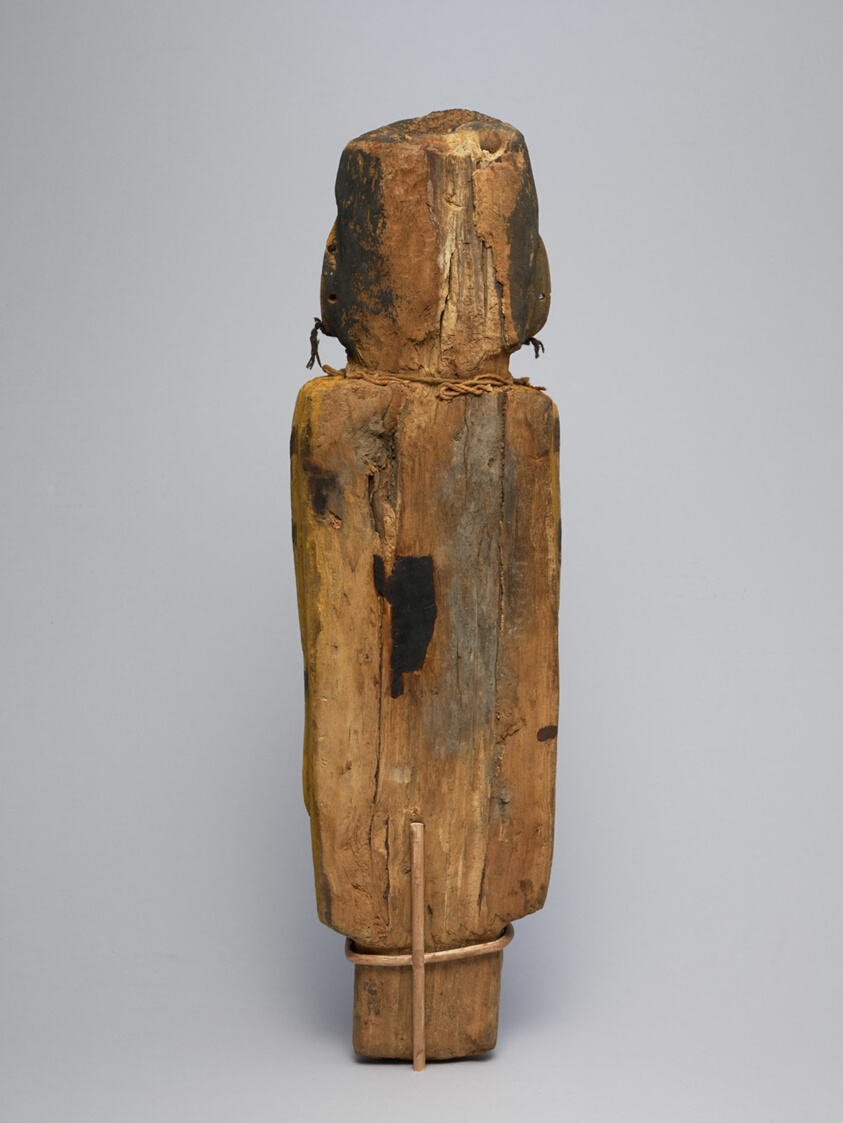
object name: Religious/Ritual Object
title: Ritual Cache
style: salado, mimbres, mogollon, americas, southwest, native american, native north american, Arts of the Americas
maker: Salado branch of the Mogollon; New Mexico, United States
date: 1300–1400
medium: Wood, stone, plant fibers, cotton, feathers, hide, and pigment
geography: New Mexico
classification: ceremonial object; ceramics; masks; ritual objects; art of the americas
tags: ceremonial objects, figures (representations), snakes, ritual objects, mountain lions, indigenous, nature, altar, offering, feathers, corn, lightning, fertility, supernatural, basketry, hunting